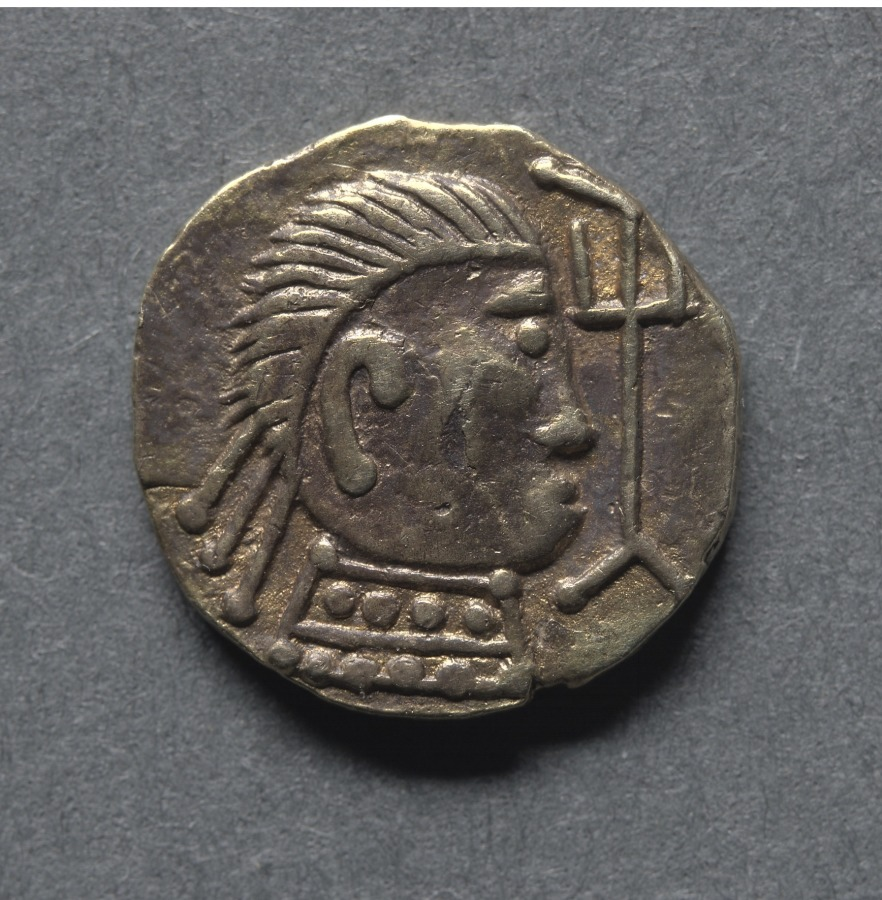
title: Witmen Tremissis: Bust and Trident (obverse); Cross Fourchée (reverse)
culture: England, Anglo-Saxon, early 7th century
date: early 600s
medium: gold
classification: Coins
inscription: WITMEN MONITA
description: The Crondall Hoard is a hoard of coins that was found in 1828 in the village of Crondall in the English county of Hampshire. It is believed to date to the seventh century and was studied by Dr. Carol Humphrey Vivian Sutherland (1908-1986), an English numismatist. He characterized this coin as being a close copy of the Witmen prototype, the most common type found in the hoard. Witmen, or his design, featuring a bust on one side and a cross on the other, seems to have been very popular and remained popular for many years. During this time however the portraits grew cruder and cruder, the legends became even more blundered, and the gold content fell lower and lower.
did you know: The tremissis was a small solid gold coin of late antiquity and was a third of a solidus.